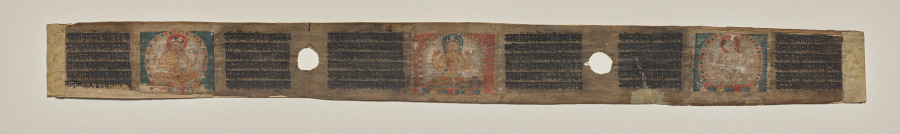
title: Prajnaparamita ﬂanked by two female ﬁgures, folio 1 (verso), from a Manuscript of the Perfection of Wisdom in Eight Thousand Lines (Ashtasahasrika Prajnaparamita-sutra)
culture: Eastern India, Bihar, Vikramashila Monastery. Painting: Nepal, Kathmandu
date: Sunday, September 14, 1119 (year 239 of the Newar Samvat in the month of Ashvina)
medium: Gum tempera and ink on palm leaf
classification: Painting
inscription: Om namo bhagavatya ārya Prajñāpāramitāyai // nirvikalpe namas tubhyaṃ prajñāpāramite 'mite yā tvaṃ sarvānavadyāṅgi niravadyair nirīkṣyase // ākāśam iva nirlepāṃ niṣprapañcāṃ nirakṣarām yas tvāṃ paśyati bhāvena sa paśyati tathāgatam // tava cārye guṇāḍhyāyā buddhasya ca jagadguroḥ na paśyanty antaraṃ santaś candracandrikayor iva // kṛpātmakāḥ prapadya tvāṃ buddhadharmapuraḥsarīm sukhenāyānti māhātmyam atulaṃ bhaktivatsale // sakṛd apy āśaye śuddhe yas tvāṃ vidhivad īkṣate tenāpi niyataṃ siddhiḥ prāpyate 'moghadarśane // sarveṣām api vīrāṇāṃ parārthaniratātmanām poṣikā janayitrī ca mātā tvam asi vatsalā // yad buddhā lokaguravaḥ putrās tava kṛpālavaḥ tena tvam api kalyāṇi sarvasattvapitāmahī // sarvapāramitābhis tvaṃ nirmalābhir anindite candralekheva tārābhir anuyātāsi sarvadā // vineyaṃ janam āsādya tatra tatra tathāgataiḥ bahurūpā tvam evaikā nānānāmabhir īḍyase // prabhāṃ prāpyeva dīptāṃśor avaśyāyodabindavaḥ tvāṃ prāpya pralayaṃ yānti doṣā vādāś ca vādinām // tvam eva trāsajananī bālānāṃ bhīmadarśanā āśvāsajananī cāsi viduṣāṃ saumyadarśanā // yasya tvayy apy abhiṣvaṅgas tvannāthasya na vidyate tasyāmba katham anyatra rāgadveṣau bhaviṣyataḥ // nāgacchasi kutaś cit tvaṃ na ca kva cana gacchasi sthāneṣv api ca [sarveṣu vidvadbhir nopalabhyase //]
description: In the center of the first folio, the personification of the texts found within the manuscript is shown as a crowned four-armed goddess holding a rosary, palm leaf, and giving a mudra, or symbolic hand gesture, indicating that she is in the process of teaching. The haloed Prajnaparamita’s golden skin tone and accoutrements showcase the image’s self-reflexive relationship to the light-colored palm leaf that was used to make this book. The text on this leaf is not the Perfection of Wisdom itself, but rather a preamble of praises to the goddess known as the Prajnaparamita-stotra of Rahula. These hymns would have continued onto folio 2 of the manuscript, which was unfortunately lost before the volume was acquired by the Cleveland Museum of Art.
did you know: Although barely visible now, delicate diaphanous scarves are draped around the arms of all three figures.